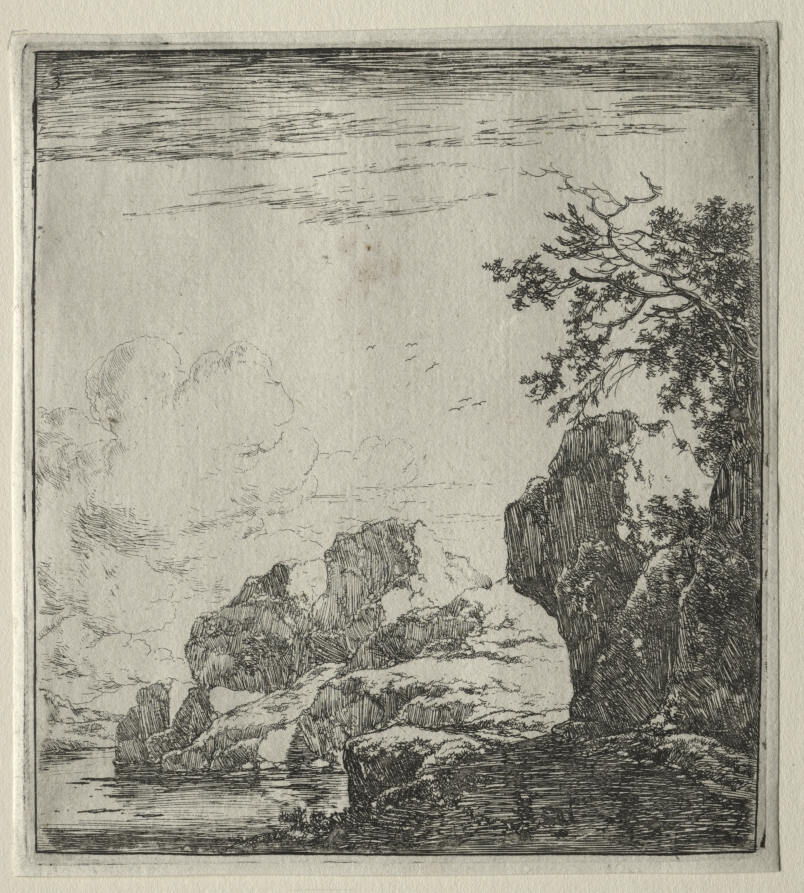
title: Le rocher couvert de buissons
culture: Flanders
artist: Herman Naiwincx (Flemish, c. 1624–after 1651)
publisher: Clement de Jonghe (Dutch, 1579–1679)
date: 1640–51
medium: engraving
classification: Print